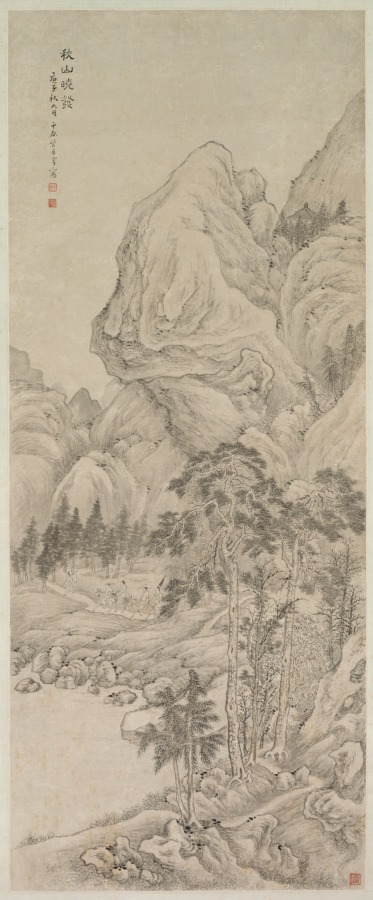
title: Landscape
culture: China, Qing dynasty (1644-1911)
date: 1644–1911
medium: hanging scroll, ink and slight color on paper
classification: Painting